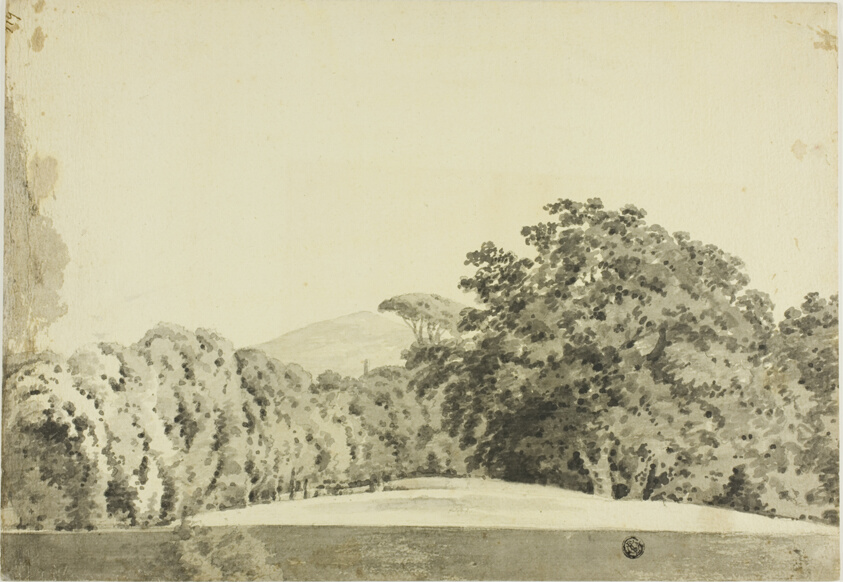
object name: Drawing and Watercolor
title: Wooded Landscape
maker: Joseph Wright of Derby (English, 1734-1797)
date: 1754/97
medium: Brush and gray wash, over graphite, on cream laid paper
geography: England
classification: ink or chalk wash; drawings (visual works); prints and drawing